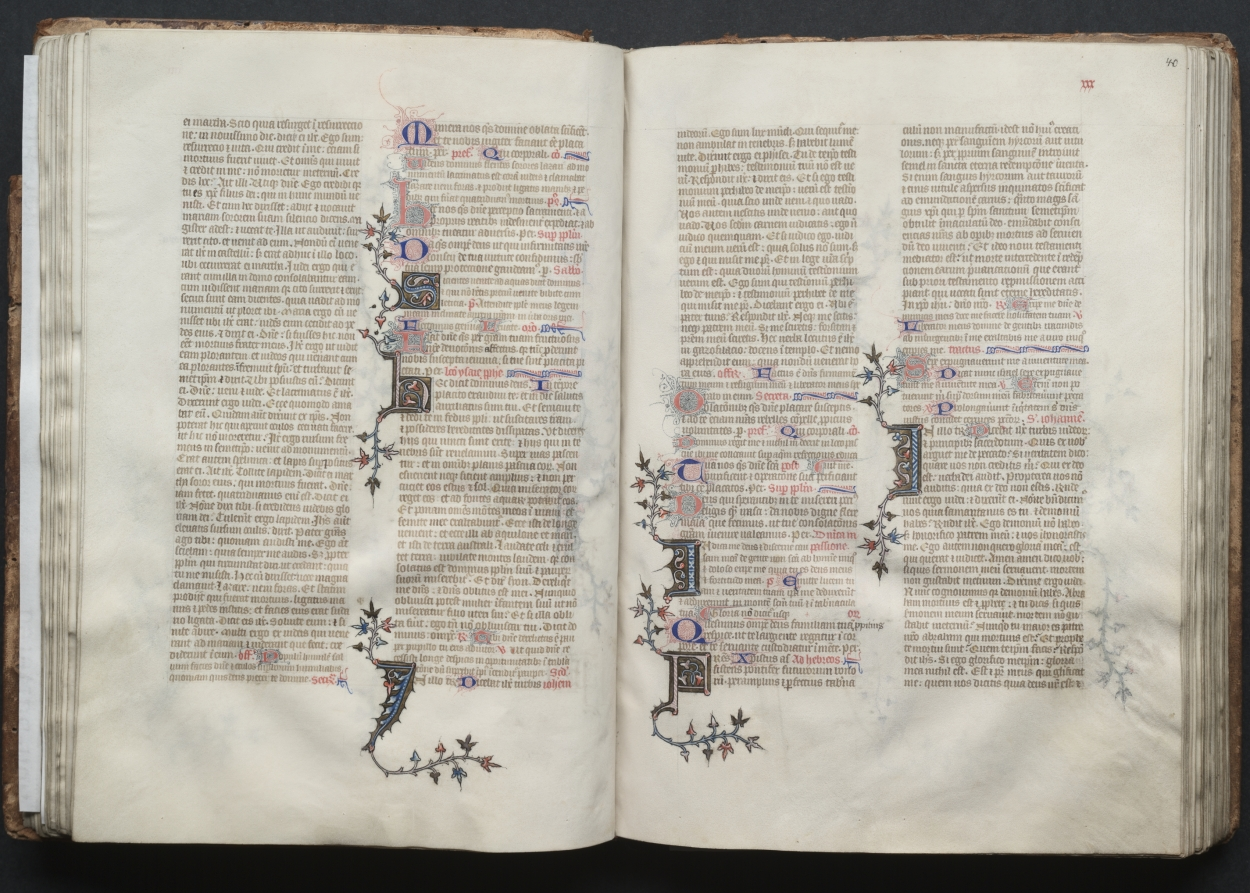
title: The Gotha Missal: Fol. 39v, Text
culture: France, Paris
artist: Master of the Boqueteaux (French)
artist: and Workshop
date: c. 1375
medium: ink, tempera, and gold on vellum; blind-tooled leather binding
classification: Bound Volume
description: The style and quality of this manuscript's decoration is typical of deluxe Parisian books made for aristocratic or royal patrons. Most of the book's decoration appears to be the work of the Master of the Boqueteaux, an artist active at the court of King Charles V (died 1380). His style was apparently shared by a number of book illuminators working in and around Paris. It is very possible that the Gotha Missal belonged to Charles V, but is not provable because the manuscript has no royal portraits and lacks a colophon. Given the book's magnificent decoration, however, it would seem that it was produced for a Valois prince, if not for the king himself. The manuscript receives its name from the German dukes of Gotha, its later owners.